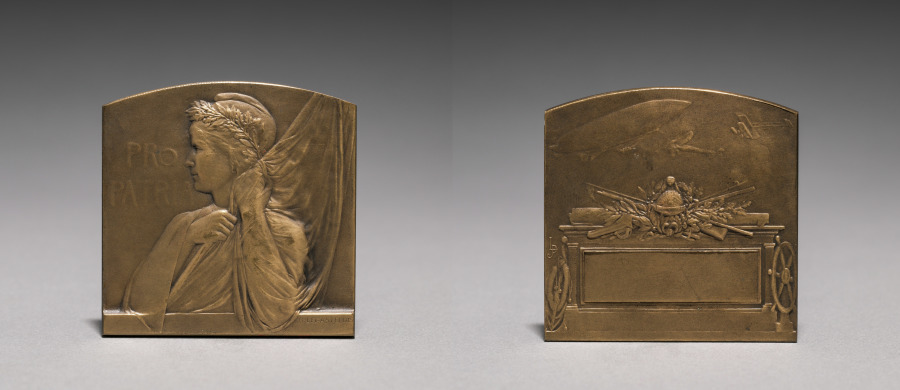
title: Medal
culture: France, 19th century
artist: Jules Prosper Legastelois (French, 1855–1931)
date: 1911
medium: bronze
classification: Metalwork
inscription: "Pro Patria."